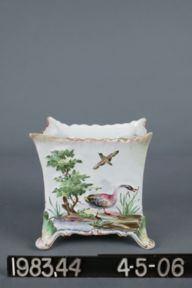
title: Flower Container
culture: France, 18th century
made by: Sceaux Factory (French, active 1748–66)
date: c. 1765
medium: faience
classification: Ceramic